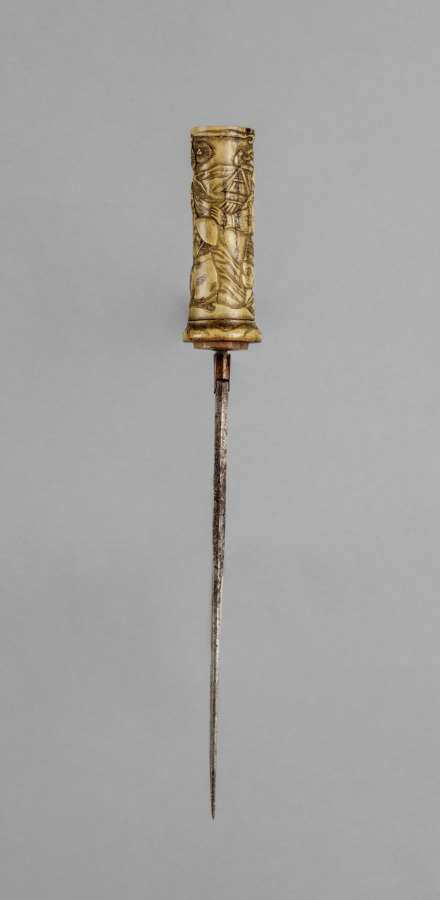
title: Knife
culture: Japan, Edo period (1615–1868)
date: late 1700s- early 1800s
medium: ivory, steel or iron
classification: Arms and Armor